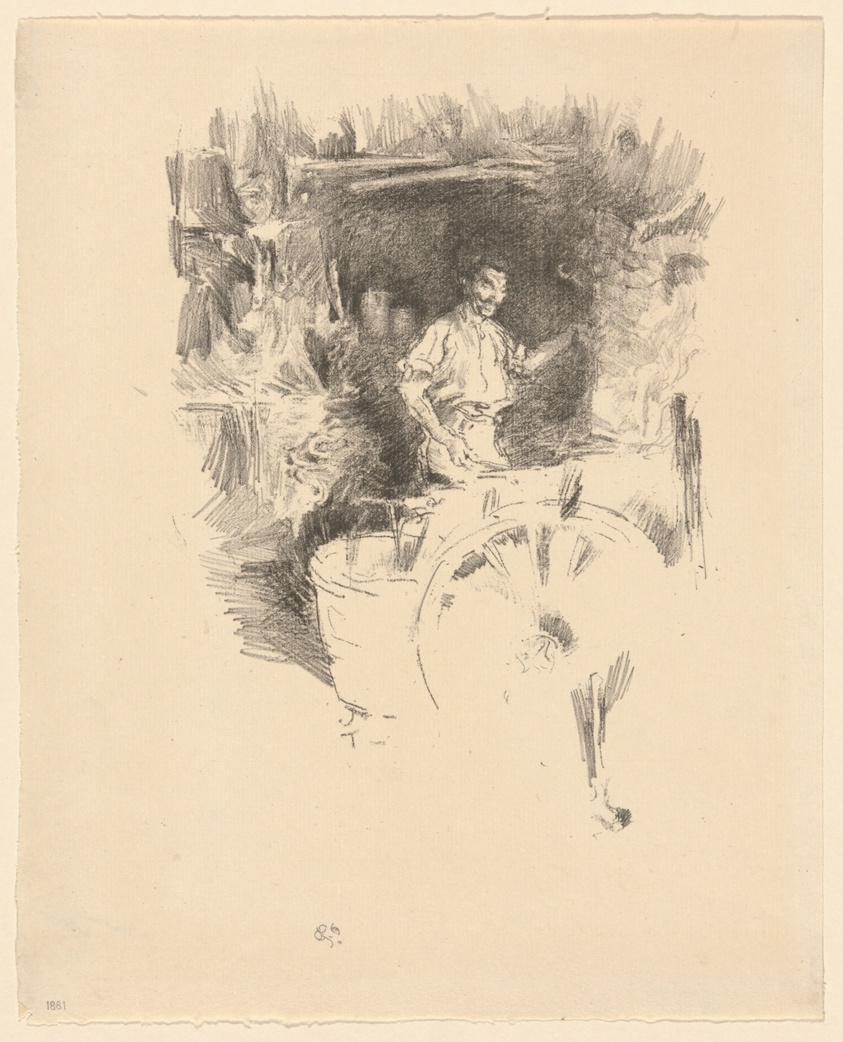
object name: Print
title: The Blacksmith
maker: James McNeill Whistler (American, 1834-1903)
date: 1895/96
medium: Transfer lithograph in black, with stumping, on cream laid paper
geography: United States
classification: transfer lithograph; lithograph; print; prints and drawing; paper